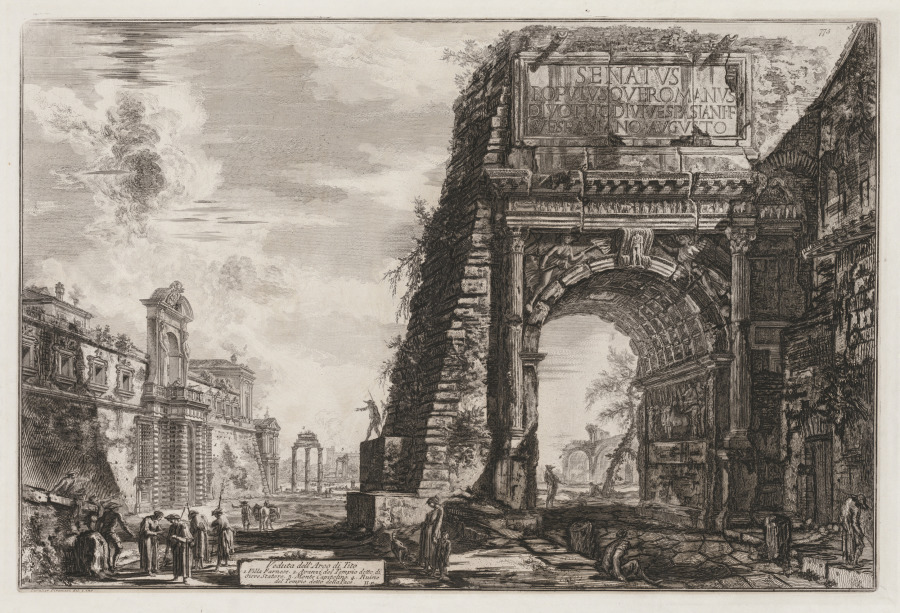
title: Views of Rome: The Arch or Titus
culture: Italy, 18th century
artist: Giovanni Battista Piranesi (Italian, 1720–1778)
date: 1776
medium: etching and engraving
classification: Print